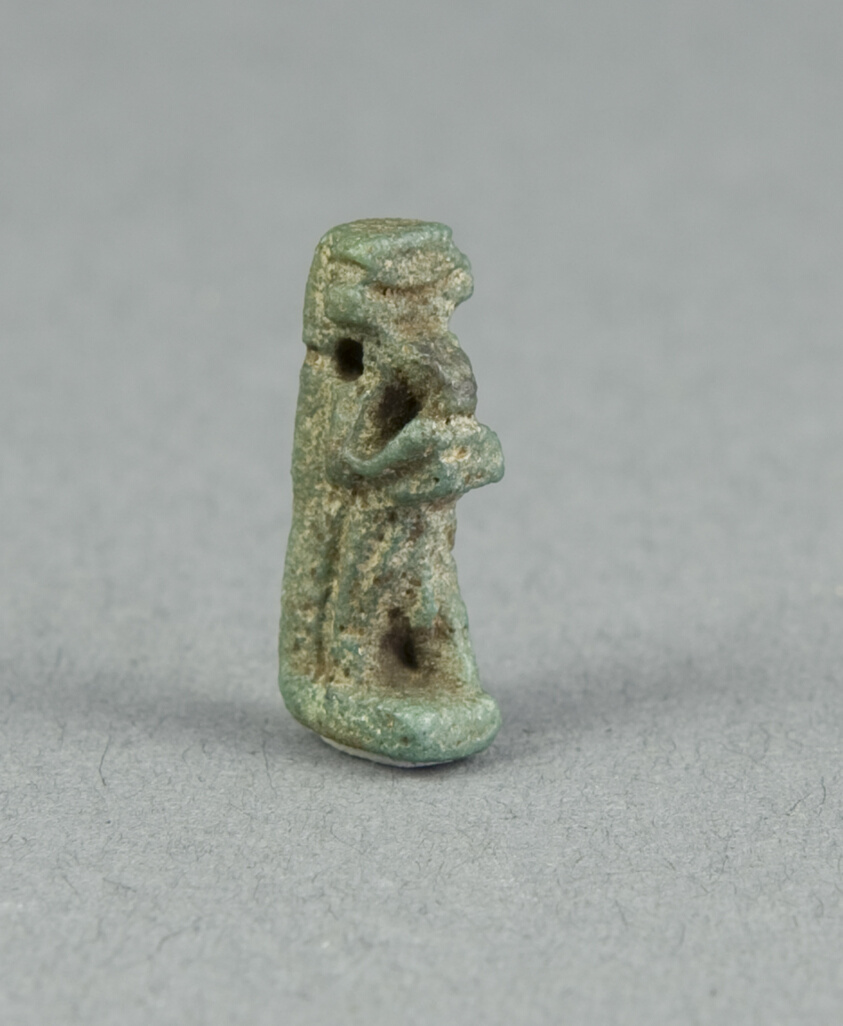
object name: Costume and Accessories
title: Amulet of the God Thoth Holding an Offering Table (?)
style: egyptian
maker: Egyptian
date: Late Period (about 664–332 BCE)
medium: Faience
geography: Egypt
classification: amulet; jewelry; ceramics; ancient art; costume; faïence (composite material)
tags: gods (deities)